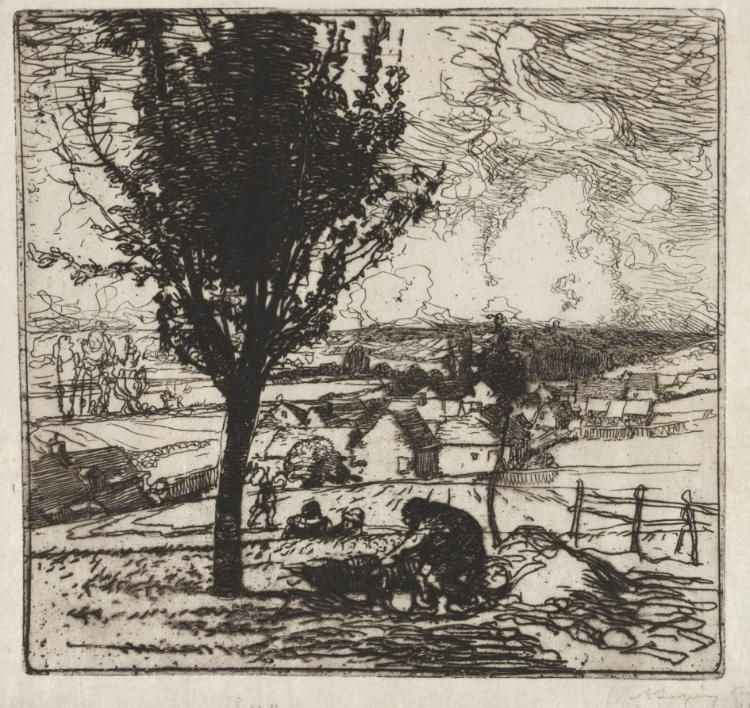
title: Veu de Jouy-le-Moutier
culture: France, 19th century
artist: Auguste Louis Lepère (French, 1849–1918)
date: 1893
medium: etching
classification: Print